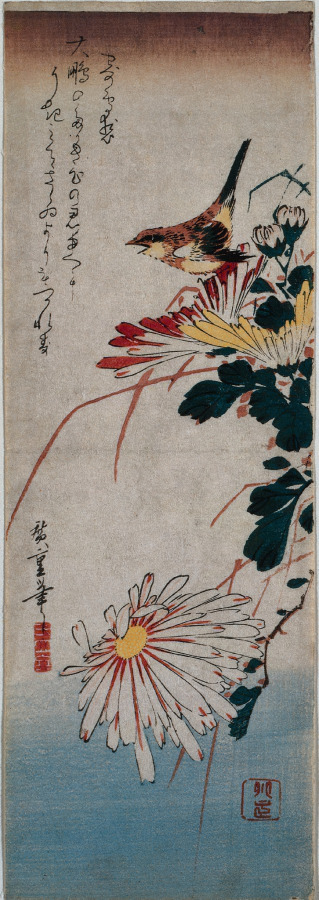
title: Wren and Chrysanthemums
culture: Japan, Edo period (1615–1868)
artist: Utagawa Hiroshige (Japanese, 1797–1858)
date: mid 1830s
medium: color woodblock print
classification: Print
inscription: Signature: Hiroshige hitsu Artist Seal: Ichiryusai Publisher: Kawaguchi Shozo (Kawasho)